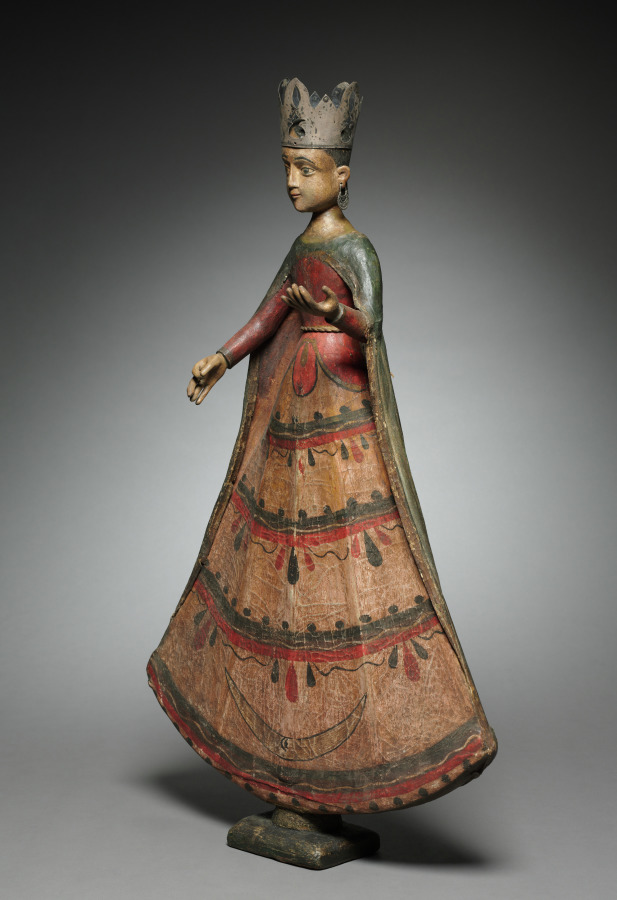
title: Santos: Virgin Crowned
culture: America, New Mexico, 19th century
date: 1800s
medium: painted wood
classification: Sculpture